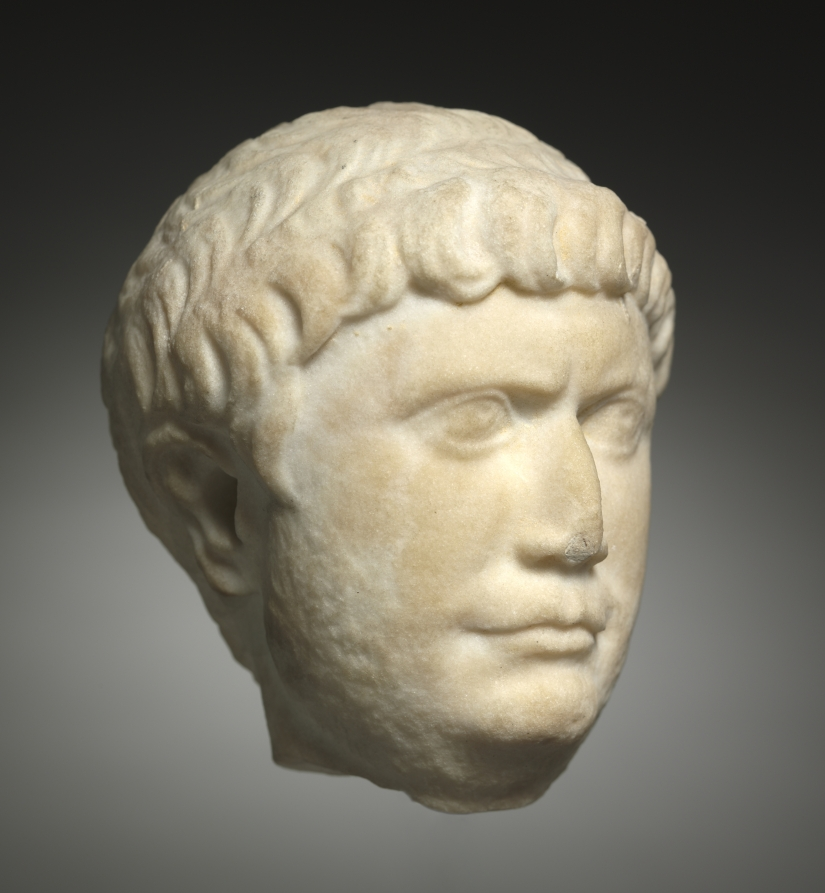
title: Head of Trajan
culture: Italy, Roman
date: 100–200 CE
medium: marble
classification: Sculpture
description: Though this portrait head has many of the features associated with the emperor Trajan, such as his short, comma-shaped forelocks, other aspects of the statue are unusual. For example, all other known portraits of Trajan depict him as clean shaven, but this one appears to have facial hair. Provincial portraits—that is, those made outside of Italy—could sometimes differ dramatically from imperial standards. This head may be an example of provincial experimentation.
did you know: Drilled pupils only began appearing on Roman portrait statues after Trajan’s death in 117 CE; their appearance here could be a later addition.